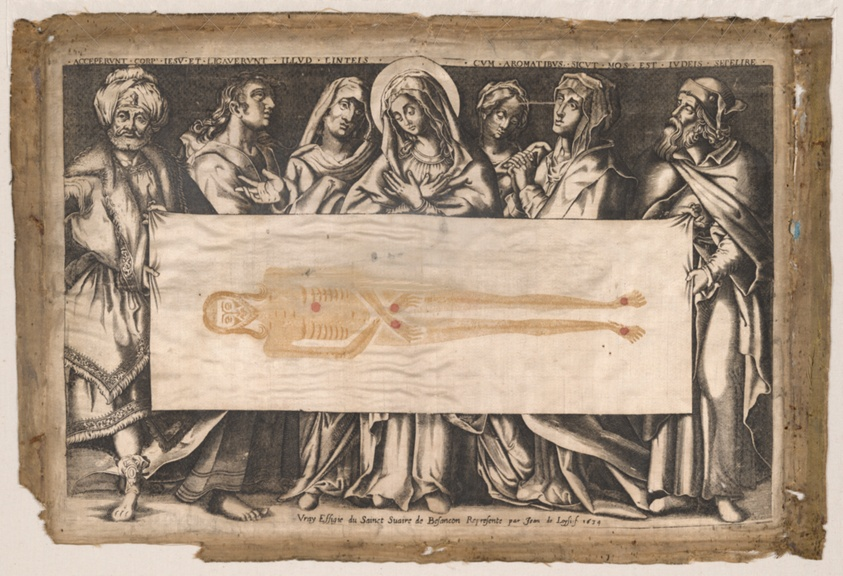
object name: Print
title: The Holy Shroud of Besançon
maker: Jean de Loisy (French, 1603-after 1660)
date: 1634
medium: Engraving in black and yellowish brown, with hand additions in red gouache on cream, silk satin weave, folded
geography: France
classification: engraving; paper; print; prints and drawing